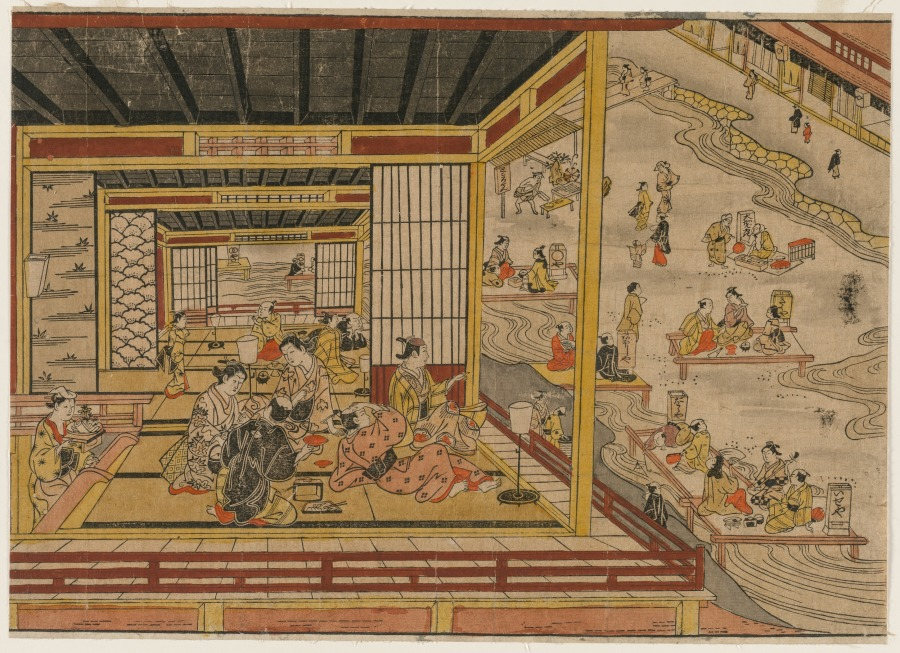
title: Tea House Beside the Kamo River in Kyoto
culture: Japan, Edo period (1615–1868)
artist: Nishimura Shigenaga (Japanese, 1697(?)-1756)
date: 1740s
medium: color woodblock print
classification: Print